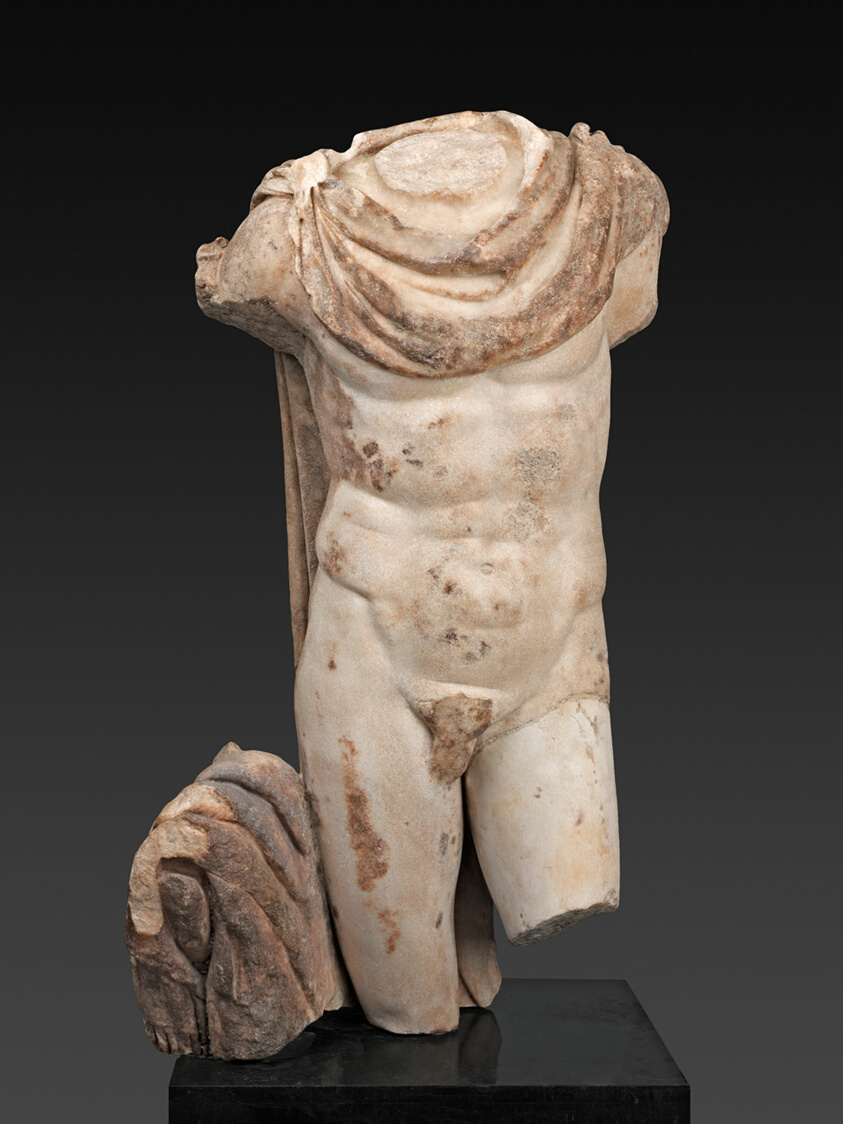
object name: Sculpture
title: Fragment of a Portrait Statue of a Man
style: hellenistic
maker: Roman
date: 2nd century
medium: Marble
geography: Roman Empire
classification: marble; stone; sculpture; ancient art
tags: portraits, mythological figures